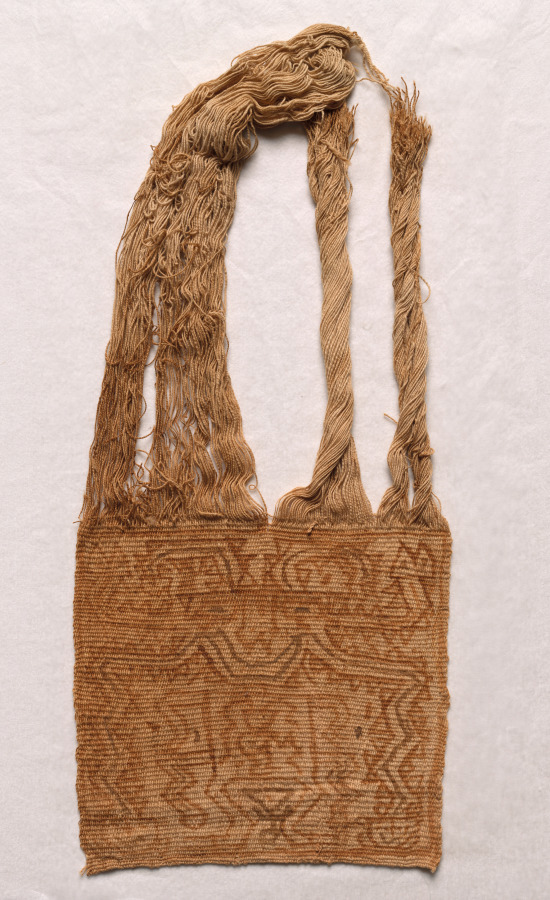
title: Mummy Bundle "Mask"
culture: Peru, South Coast, Ica Valley, Ocucaje site, Paracas style (700 BCE–1 CE)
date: 400–200 BCE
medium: Cotton and pigment; plain weave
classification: Textile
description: The Paracas people buried their dead in bundles that they created by carefully wrapping the seated human body in layers of garments and other textiles. In some cases, they placed a painted cloth—such as these examples—on the outer layer and at the top of the bundle. The hair-like yarns (unwoven warps) were arranged around a solid cotton disk that was sometimes wrapped with a headband. The cloths, then, seem to have functioned as the bundle’s head, even though some are painted not with faces but with complete figures whose supernatural character is marked by the appendages streaming from their bodies.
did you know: These masks fall into two categories, those with only a face and those with a full-bodied figure.